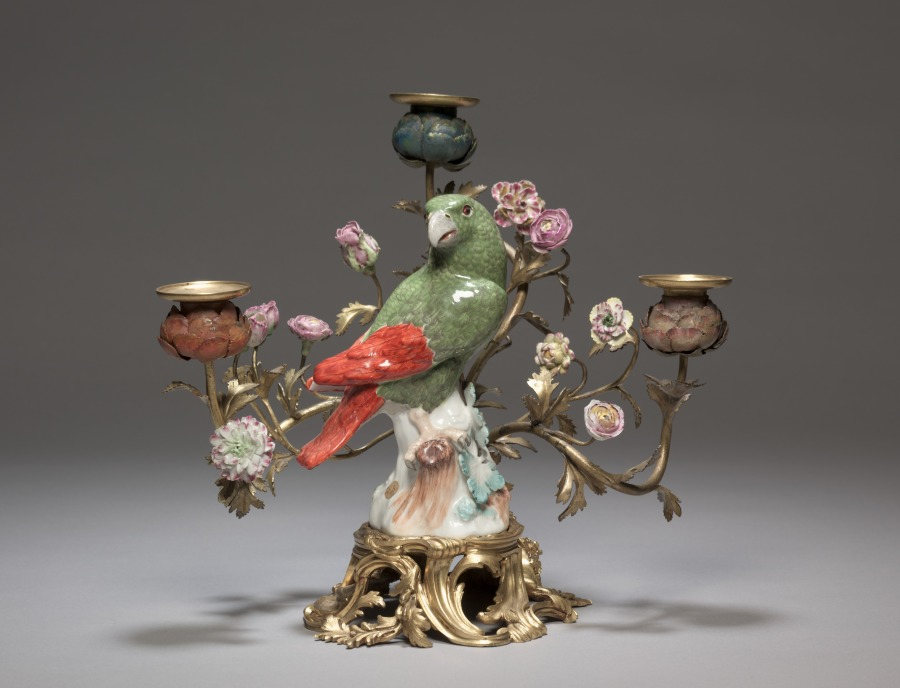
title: Candelabrum with Parrot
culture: Germany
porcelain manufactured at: Meissen Porcelain Factory (German, est. c. 1710)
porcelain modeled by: Johann Joachim Kändler (German, 1706–1768)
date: c. 1740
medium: porcelain mounted in gilt bronze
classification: Ceramic